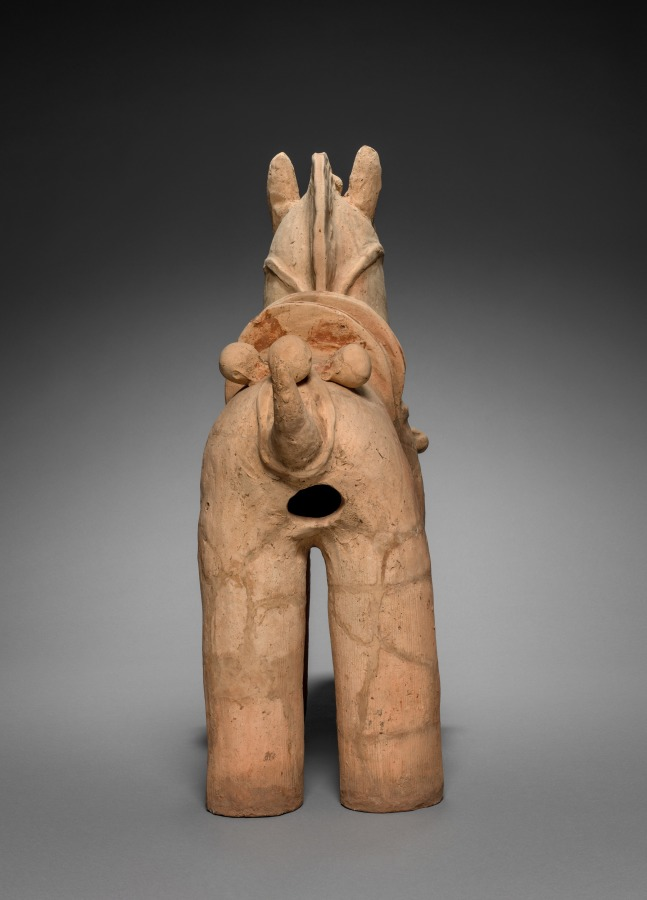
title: Haniwa Horse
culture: Japan, Kofun period (300–710 CE)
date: 400s–500s CE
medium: earthenware with traces of pigment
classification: Sculpture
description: This horse’s tack, with its round bells, resembles saddlery in fashion in Korea during the 400s–500s CE. Concurrent with mass migration from the Korean Peninsula, tombs covered with large earthen mounds similar to those on the Asian continent began to appear in Japan around the year 300 CE. Called “old mounds” (kofun), their surfaces were covered with hollow clay cylinders (haniwa). Sculptures of animals, buildings, and finally human figures followed, developing over the ensuing three centuries.